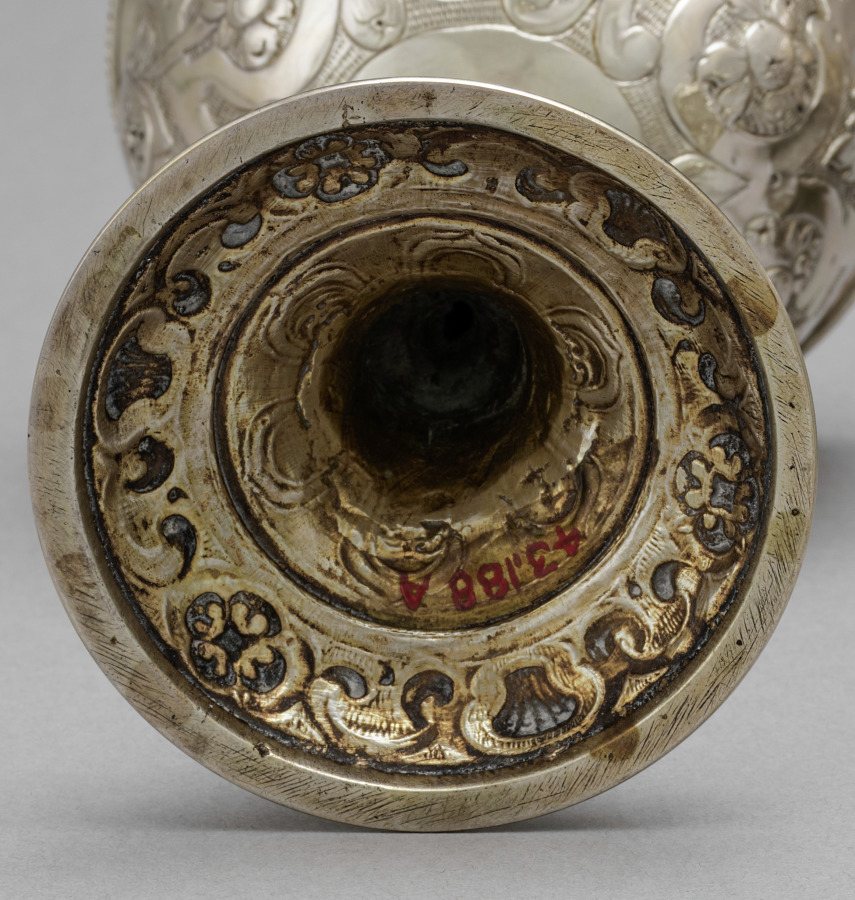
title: Bridal Cup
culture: Germany, Nuremburg(?), 17th century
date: c. 1600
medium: silver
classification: Silver